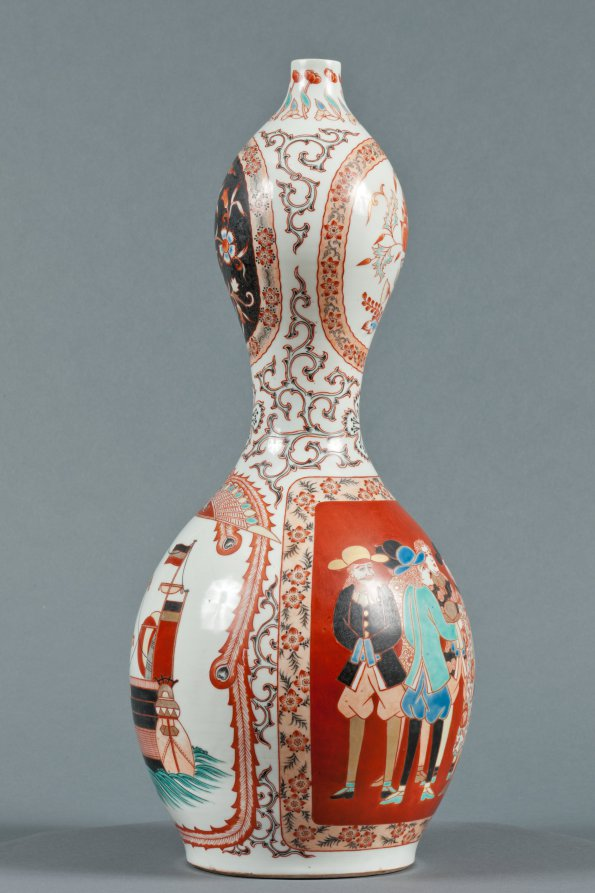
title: Bottle with Western Ships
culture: Japan, Edo period (1615–1868)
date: c. 1800–1868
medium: Porcelain with decoration in colored enamels and underglaze blue, overglaze enamels, and gold (Hizen ware, Arita type)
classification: Ceramic